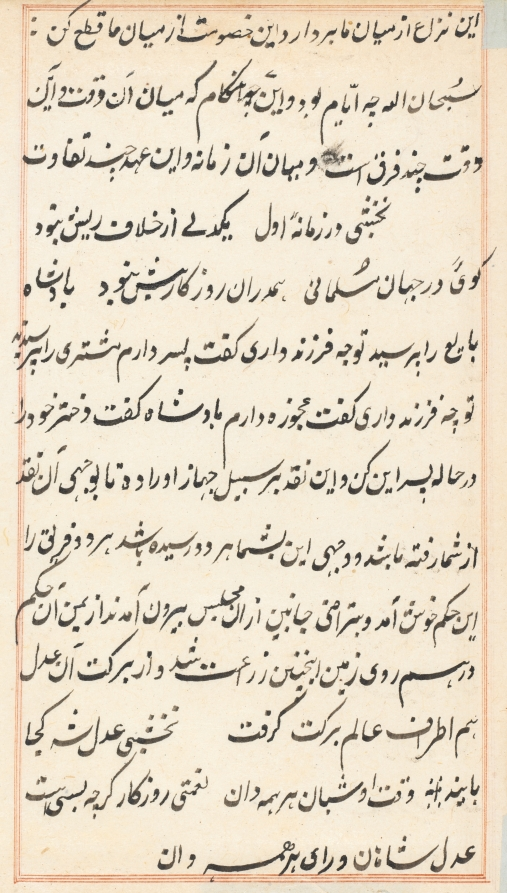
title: Page from Tales of a Parrot (Tuti-nama): text page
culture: Mughal India, court of Akbar (reigned 1556–1605)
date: c. 1560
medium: gum tempera, ink, and gold on paper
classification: Painting